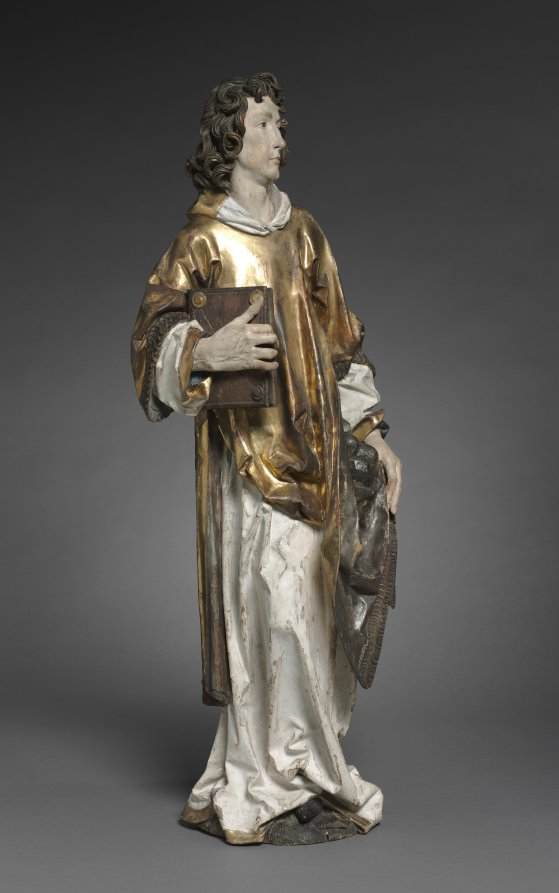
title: Saint Stephen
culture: Germany, Würzburg, 16th century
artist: Tilman Riemenschneider (German, active Würzburg, c. 1460–1531)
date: 1502–8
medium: lindenwood with polychromy and gilding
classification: Sculpture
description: This sculpture, along with that of Saint Lawrence (1959.42) and two others in Germany, are believed to be the remaining fragments of a large altarpiece carved by Riemenschneider for the Dominican convent in Rothenburg in Franconia (demolished in 1813). Saints Stephen and Lawrence both wear the dalmatic to indicate their status as deacons in the early church. Each holds a symbol of his martyrdom; here, Saint Stephen cradles some stones to indicate his death by stoning. Art in Germany through the early 1500s remained firmly anchored in the late Gothic style with its associated interests in realism. Riemenschneider was one of the most prolific and versatile sculptors of this style, a recognized master in both stone and wood. His flourishing workshop employed as many as 40 apprentices in sculpting, woodcarving, and painting. His sculptures are noted for the dreamy, melancholy, and introspective quality in their expressions, as well as their remarkable attention to detail.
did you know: Tilman Riemenschneider (c. 1460–1531) is probably the most famous German sculptor of the period around 1500.